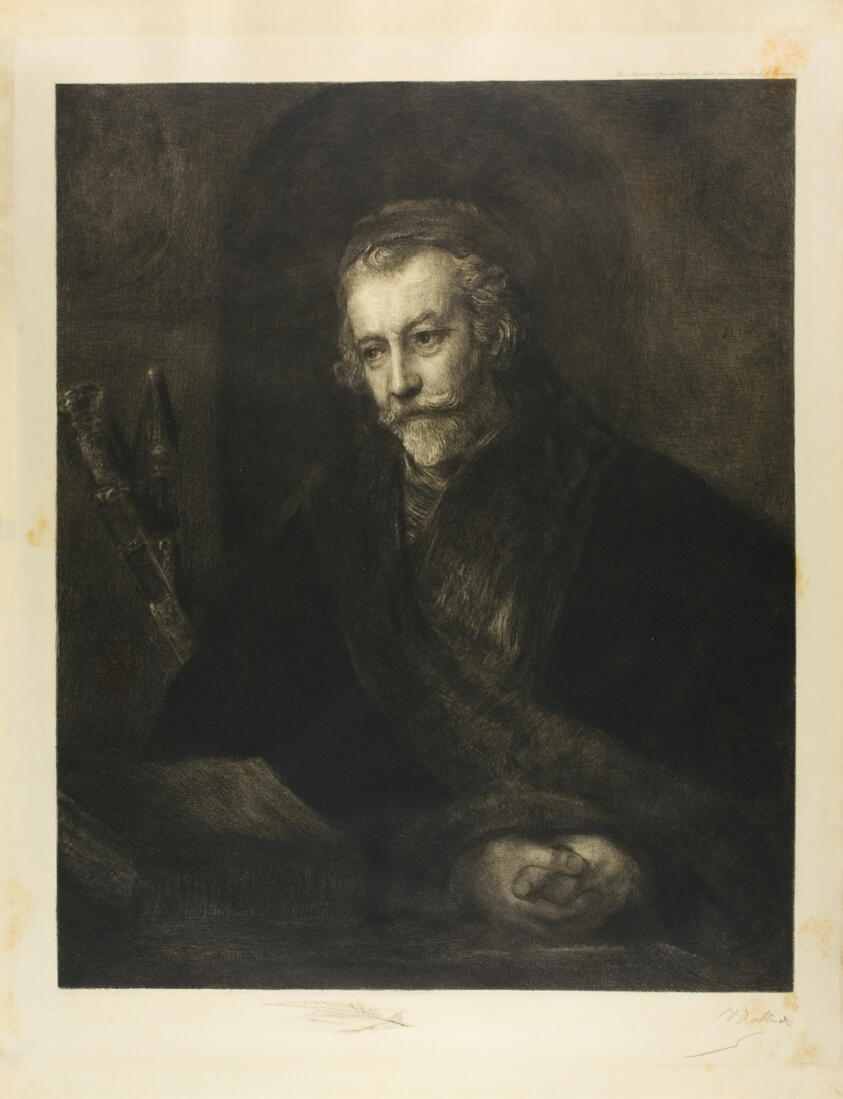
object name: Print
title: Portrait of a Man in a Cap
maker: Charles Albert Waltner (French, 1846-1925); after Rembrandt van Rijn (Dutch, 1606-1669)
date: published January 1, 1886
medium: Etching on cream wove paper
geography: France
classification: etching; print; prints and drawing